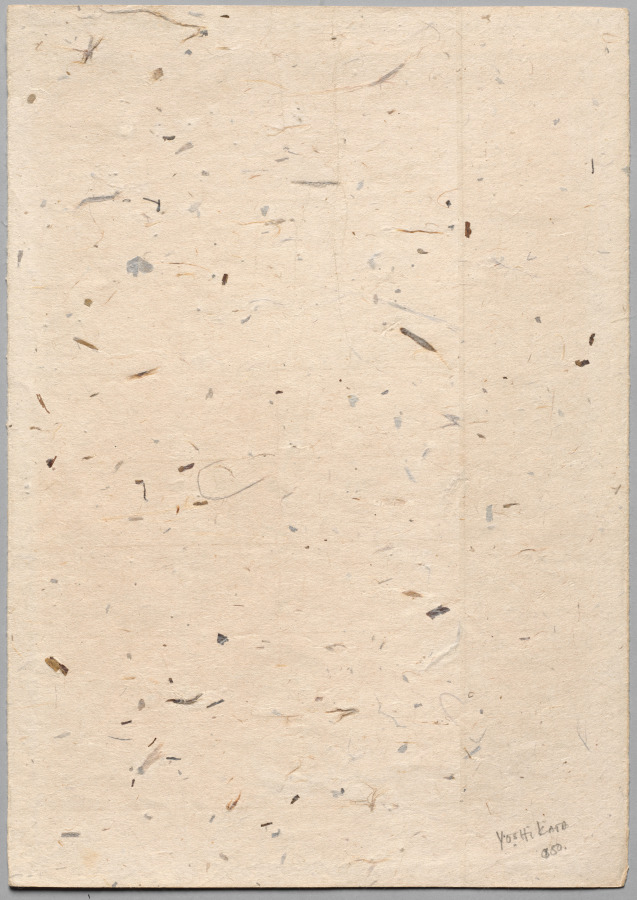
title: Chasing Fireflies, A Lady of the Tenmei Era (1781-1789), from the series Thirty-six Elegant Selections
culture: Japan, Meiji period (1868–1912)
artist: Mizuno Toshikata (Japanese, 1866–1908)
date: 1894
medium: Woodblock print, ink and color on paper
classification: Print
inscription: Inscription Type: series title Inscription Transliteration: 三十六佳撰 Inscription Romanization: Sanjūrokkasen Inscription translation: The Thirty-six Elegant Selections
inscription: Inscription Transliteration: 蛍狩天明頃婦人 Inscription Romanization: Hotaru gari, Tenmei goro fujin Inscription translation: Chasing Fireflies, A Lady of the X Era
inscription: Inscription Type: artist’s signature Inscription Transliteration: 年方 Inscription Romanization: Toshikata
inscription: Inscription Type: artist’s seal Inscription Transliteration: 應斎年方 Inscription Romanization: Ōsai Toshikata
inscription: Inscription Type: engraver’s seal Inscription Transliteration: えん活刀 Inscription Romanization: En-Katsu to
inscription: Inscription type: date and publisher’s information Inscription Translation: Meiji 27 (1894) Akiyama Buemon (summary)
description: Each of the prints in the series Thirty-six Elegant Selections features a woman from a different time period, as befits an artist who was interested in history painting. Most of the prints are set in the Edo period (1615–1868). Mizuno Toshikata was a favored student of Tsukioka Yoshitoshi (1839–1892), and took over his post as a newspaper illustrator.